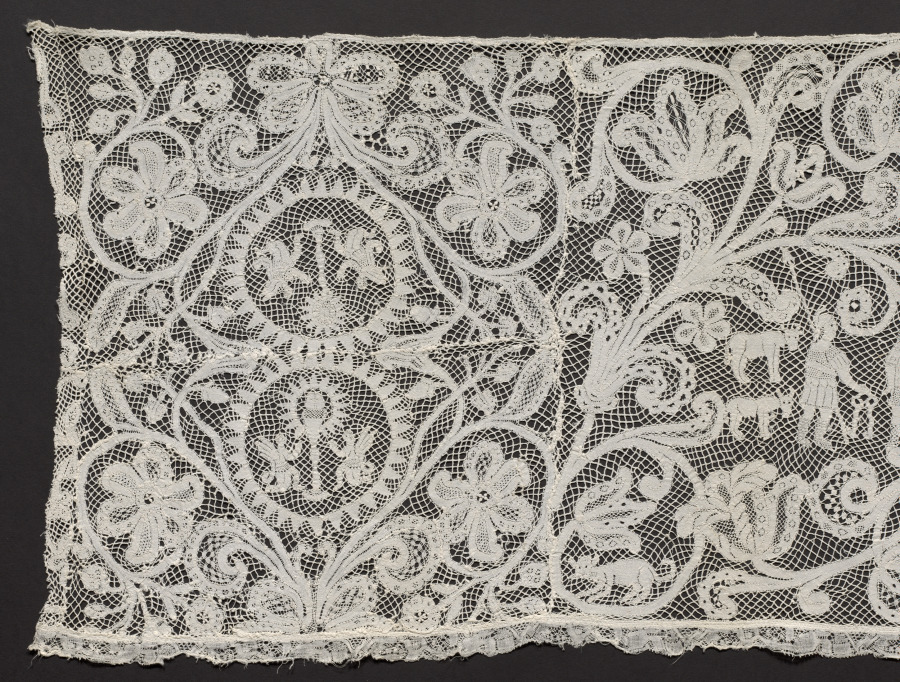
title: Lace Flounce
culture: Italy, Milan(?)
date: 1750–99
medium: Linen: bobbin lace (Punto di Milano)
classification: Lace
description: Being the most prestigious material, lace was used extensively by the 1600s for altar linen and for trimming priest’s albs, often incorporating finely rendered religious images amid blossoming vines. This alb flounce depicts scenes from the Old Testament story of Joseph, whose jealous brothers sold him to a caravan bound for Egypt. Joseph later interpreted dreams of the pharaoh, who made him ruler. When famine in Canaan caused Joseph’s ten brothers to travel to Egypt in search of food, they bowed down to him. After he revealed his identity, he forgave his brothers and God saved the family.